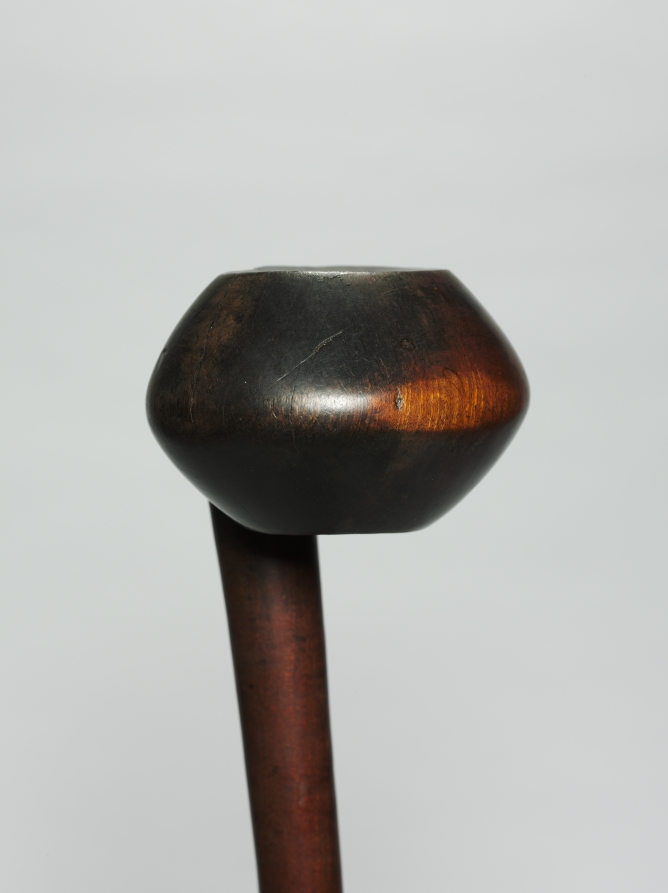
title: Club (Knobkerrie)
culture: Southern Africa, South Africa, Northern Ngun-style or Zulu-style maker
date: late 1800s or early 1900s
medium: Wood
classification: Arms and Armor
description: Relatively short sticks historically used for hunting and fighting are customarily called knobkerries. A combination of Afrikaans and Shona words, the name refers to the characteristic spherical knob of wood (knop) or head atop a cylindrical shaft (kirri). The knobs on these were carved into a tight whorl and a compressed sphere with a central rib. Even though their basic shapes were derived from real weapons, many of these precious objects were rarely if ever used as such. Highly personal, they instead functioned as ceremonial display items or regalia, symbolizing the masculinity and prowess of their owner.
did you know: The term knobkerrie refers to a characteristic spherical knob of wood or head atop a cylindrical shaft.